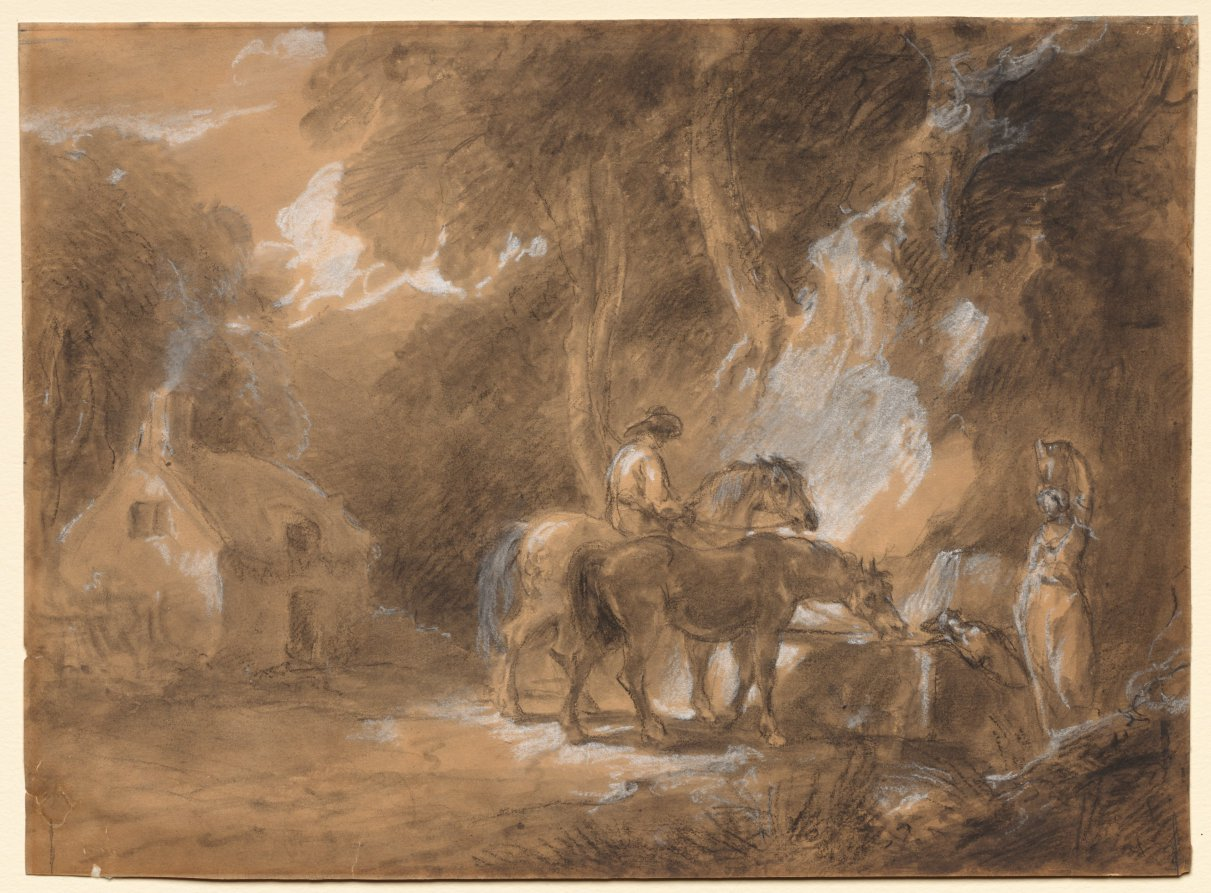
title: The Halt at the Spring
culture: England, 18th century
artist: attributed to Thomas Barker (British, 1769–1847)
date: c. 1789–1847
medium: charcoal heightened with white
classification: Drawing